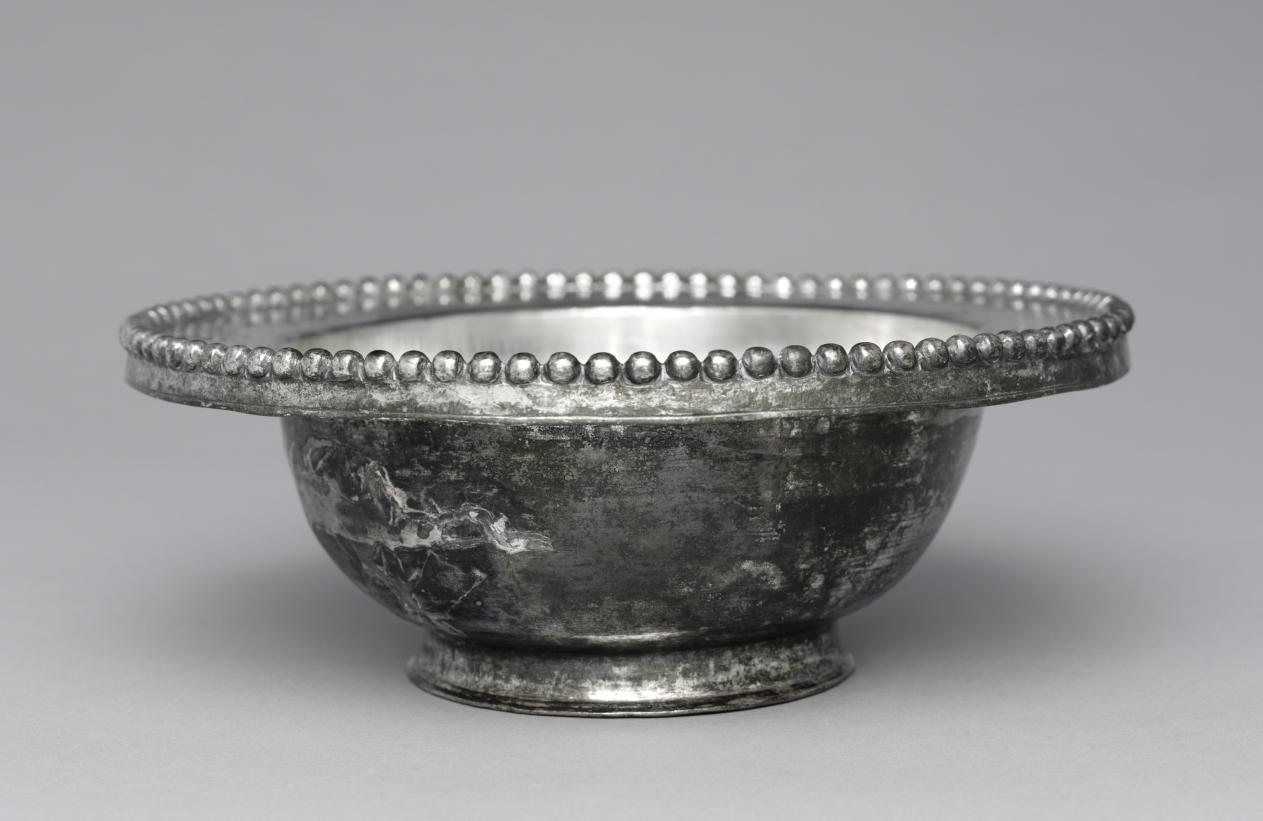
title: Bowl with Beaded Rim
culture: Byzantium, Syria(?), Byzantine period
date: 300–500 CE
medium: silver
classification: Metalwork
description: This bowl was probably intended for use in a private home, perhaps a fashionable villa on the Mediterranean coast. Wealthy Romans stored a variety of silver vessels and implements for entertaining and enjoyed using them while eating and drinking at social events. This bowl is decorated with a beaded rim, a feature often found on domestic silver bowls of this period. The basic shape was formed first by hammering. Then the bowl was polished and chased while it turned on a lathe. The beaded decoration was achieved by hammering the silver into a mold.